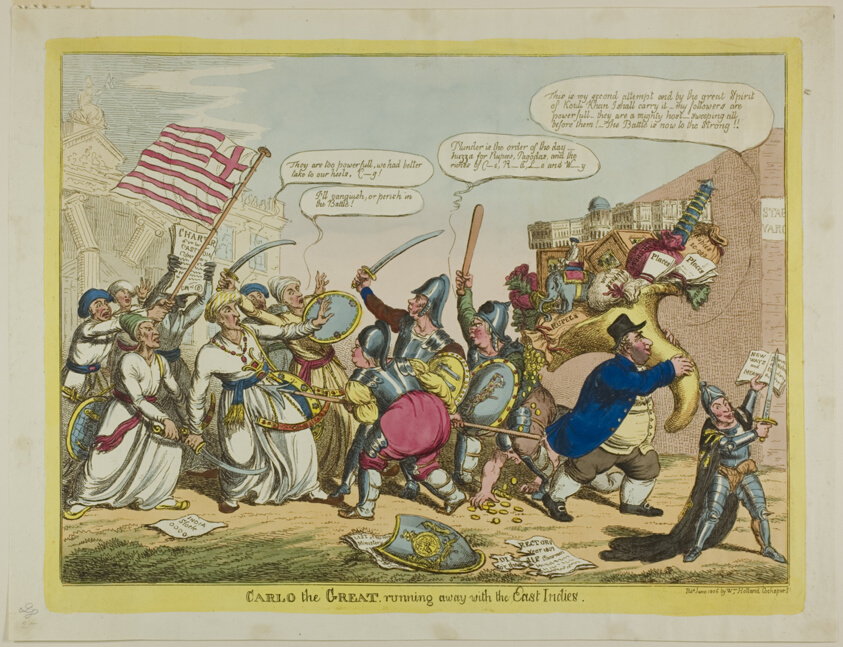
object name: Print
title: Carlo the Great, Running Away with the East Indes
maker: Charles Williams (English, active 1797-1830); published by William Holland (English, 1757-1815)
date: published June 1806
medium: Etching, with hand-coloring, on paper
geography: England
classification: etching; print; prints and drawing